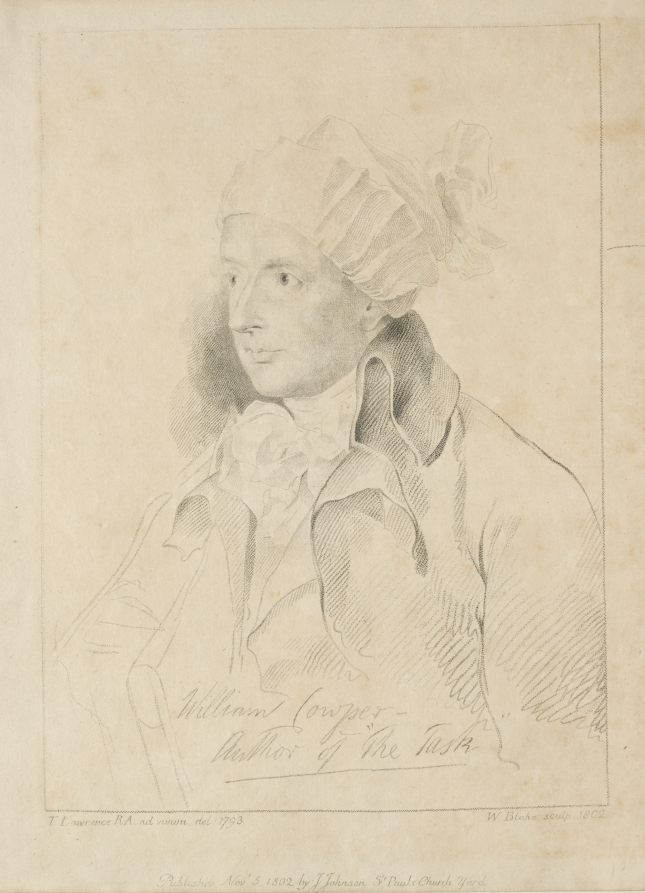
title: William Cowper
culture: England, early 19th Century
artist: William Blake (British, 1757–1827)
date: 1802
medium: engraving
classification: Print